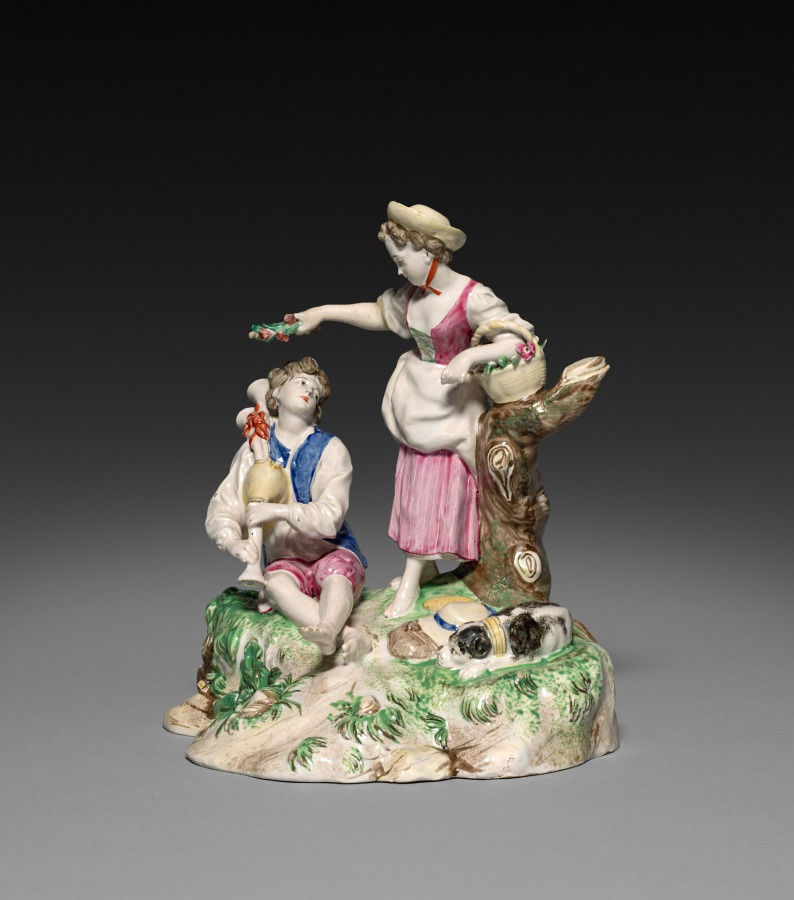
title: Shepherd and Shepherdess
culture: France, 18th century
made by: possibly by Niderviller Factory (French)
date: 1770–1775 ?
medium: faience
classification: Ceramic